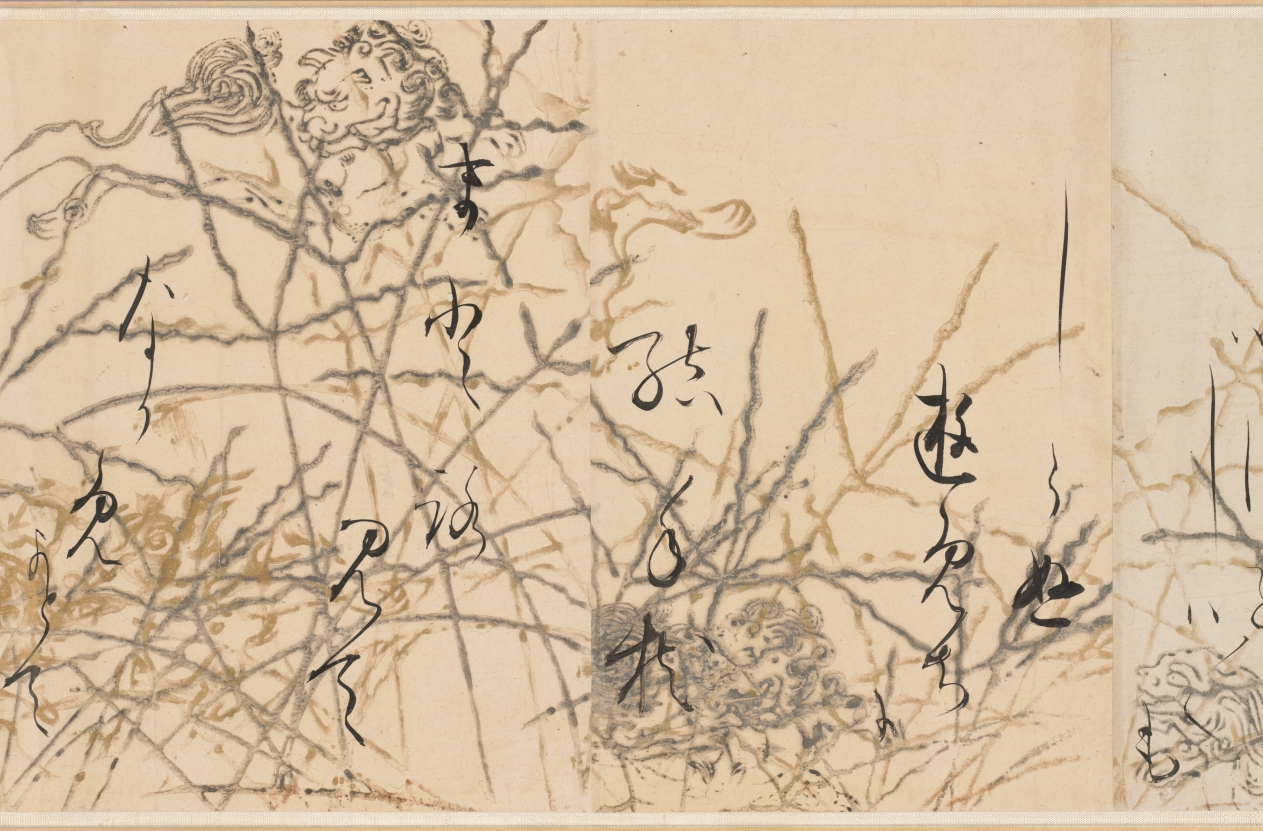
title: Selections from the New Collection of Japanese Poems from Ancient and Modern Times (Shinkokin wakashū) with Printed Designs of Chinese Lions and Crab Finger Grass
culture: Japan, Edo period (1615–1868)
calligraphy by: Hon'ami Kōetsu (Japanese, 1558–1637)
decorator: Tawaraya Sōtatsu (Japanese, c. 1570–c. 1640)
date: early 1600s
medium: handscroll; ink, gold, and silver on paper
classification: Calligraphy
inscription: Seal: 光悦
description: Hon’ami Kōetsu was a calligrapher and craftsman who frequently collaborated with the painter Tawaraya Sōtatsu, considered the first master of the Rinpa school. Kōetsu brushed seven poems from the autumn section of a poetry anthology onto dyed paper with motifs designed and printed in gold and silver by Sōtatsu.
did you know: Before becoming a master painter of screens, Tawaraya Sōtatsu painted fans.